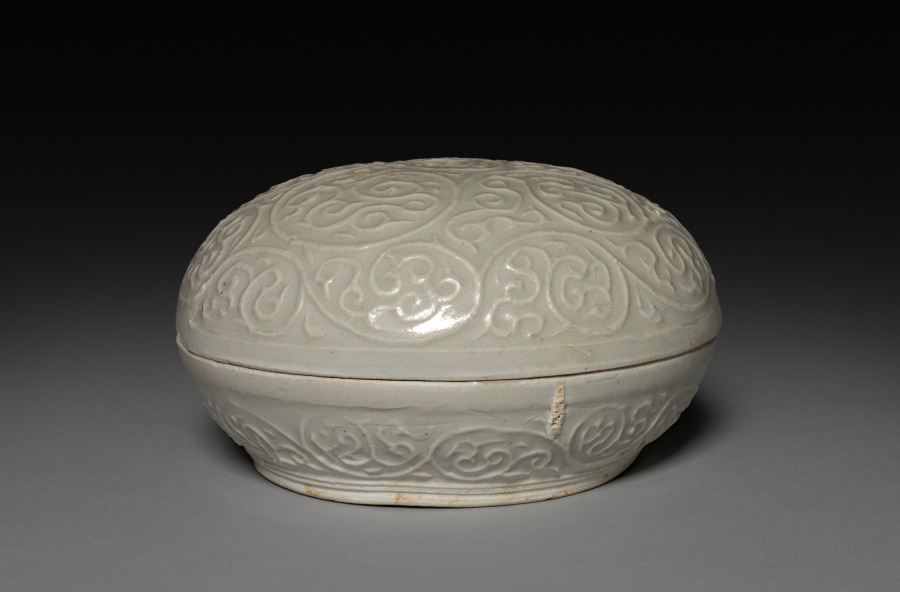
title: Round Covered Box with Floral Scrolls in Relief: Qingbai type Ware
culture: China, Fujian province, Anxi xian, Yuan dynasty (1271-1368)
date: 1300s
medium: glazed porcelain with slip decoration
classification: Ceramic